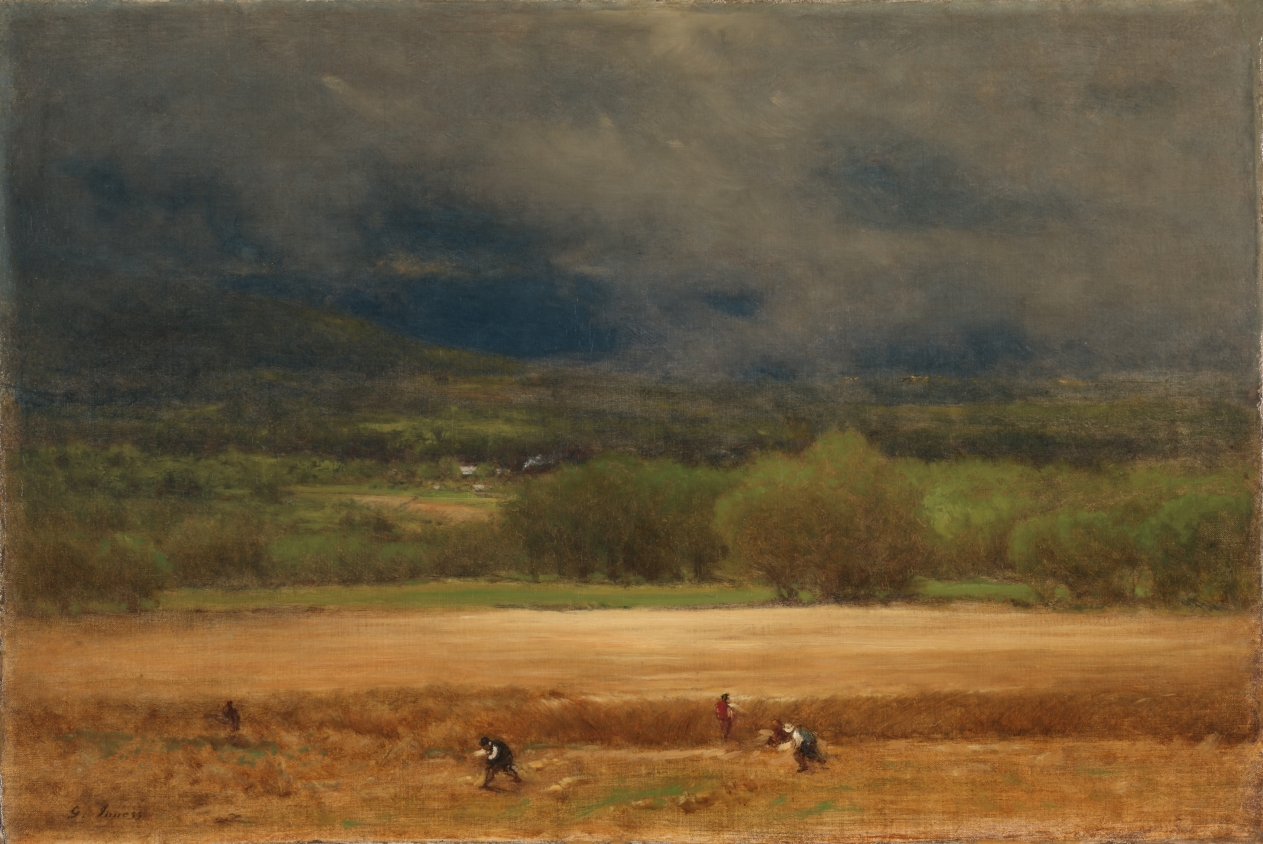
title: The Wheat Field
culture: America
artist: George Inness (American, 1825–1894)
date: c. 1875–77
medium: oil on canvas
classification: Painting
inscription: Signed lower lert: "G. Inness"